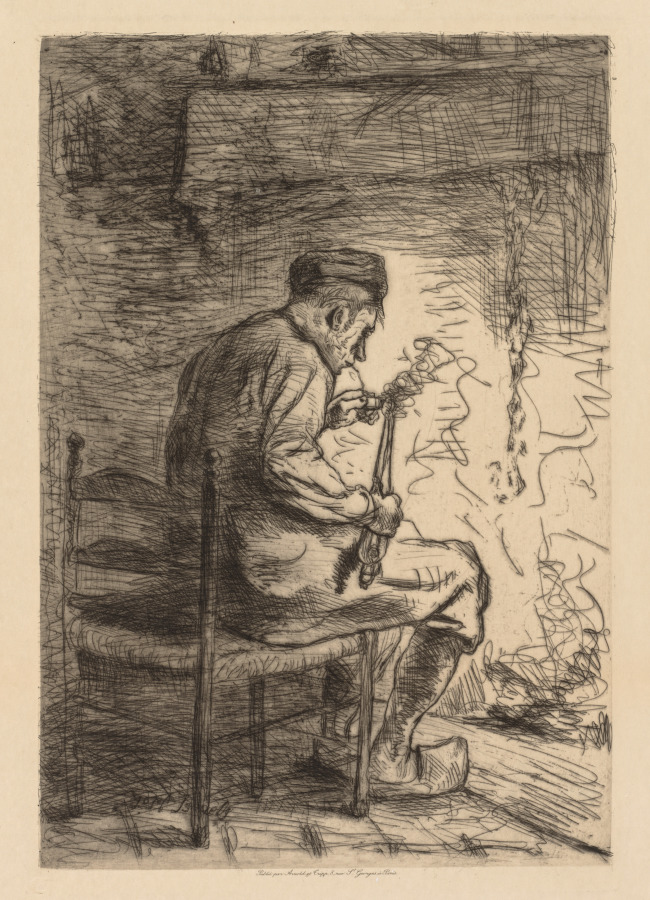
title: The Smoker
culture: Netherlands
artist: Jozef Israëls (Dutch, 1824–1911)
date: 1882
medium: etching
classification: Print